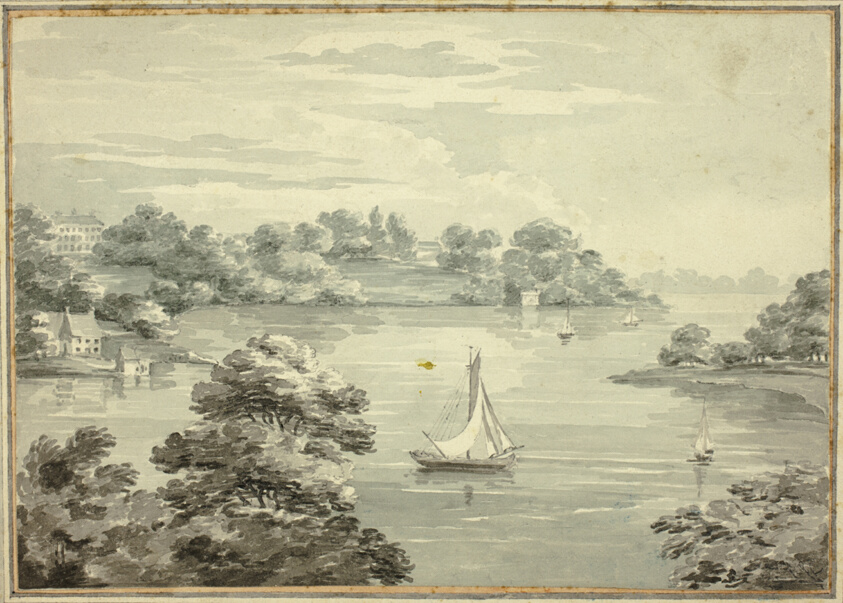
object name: Drawing and Watercolor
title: Sailing Boats on Lake with Houses near Shore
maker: Possibly Thomas Hearne (English, 1744-1817); or Thomas Sunderland (English, 1744-1828); or James Barne (English, 1773-1854)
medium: Brush and blue and gray wash, over graphite, on ivory wove paper, laid down on cream wove paper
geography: England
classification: ink or chalk wash; paper; drawings (visual works); prints and drawing